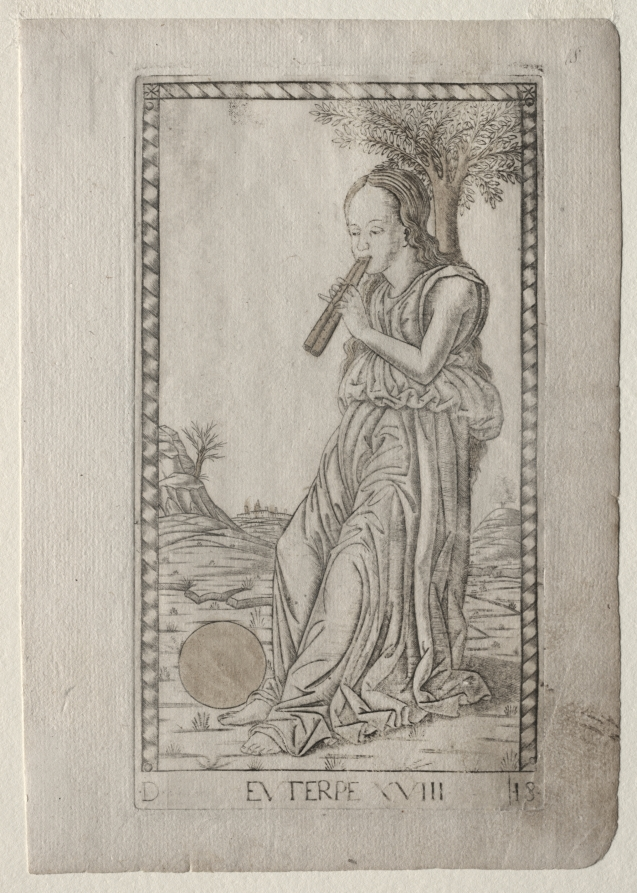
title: Euterpe (music, lyric poetry) (from the Tarocchi series D: Apollo and the Muses, #18)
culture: Italy, Ferrara, 15th century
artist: Master of the E-Series Tarocchi (Italian, active 1460s)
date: before 1467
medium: engraving hand-colored with gold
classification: Print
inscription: Lettered below the image of Euterpe: ·D· / ·EUTERPE ·XVIII· / ·18·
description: This engraving is part of the Tarocchi group marked with the letter “D”, and named Apollo and the Muses. In Greek mythology, the nine Muses (Calliope, Urania, Terpsichore, Erato, Polyhymnia, Thalia, Melpomene, Euterpe, and Clio) were the daughters of Zeus, king of the gods, and Mnemosyne, the Titaness of memory. The Muses were goddesses presiding over different branches of the arts and sciences. Their leader and supervisor was Apollo, the god of light, music, prophecy, and poetry. Here, Euterpe is personified as a full-length female figure, turned to left, and leaning against a tree set in an imaginary hilly landscape. She is playing an aulos, an ancient Greek instrument, similar to a flute. Euterpe was regarded as the Muse of music and lyric poetry.